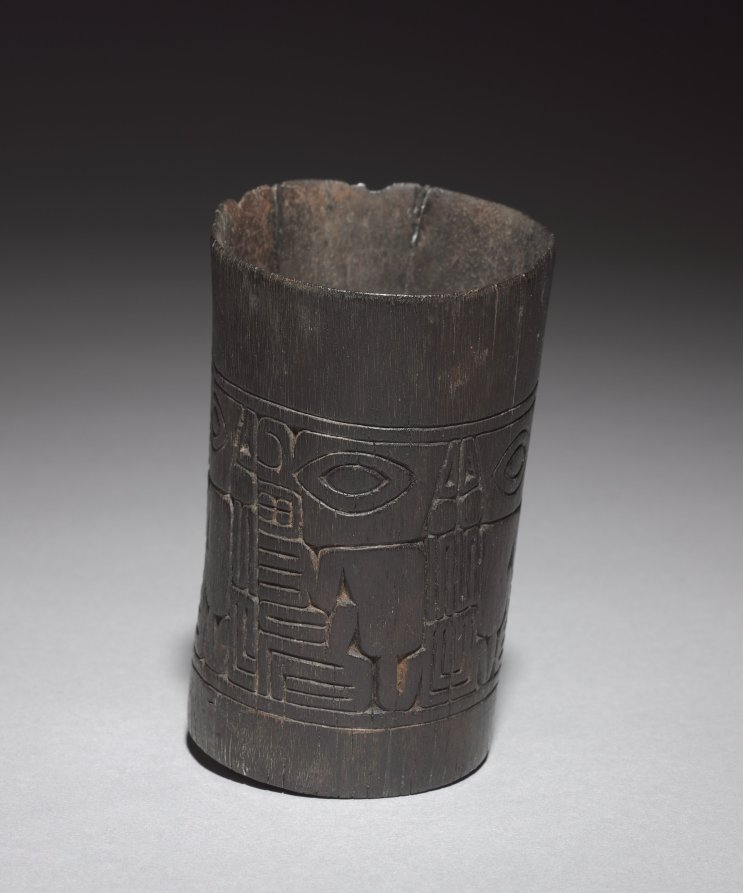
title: Cup with Head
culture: Peru, North-Central Coast(?), 9th-10th Century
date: 800–1000(?)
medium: wood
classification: Sculpture